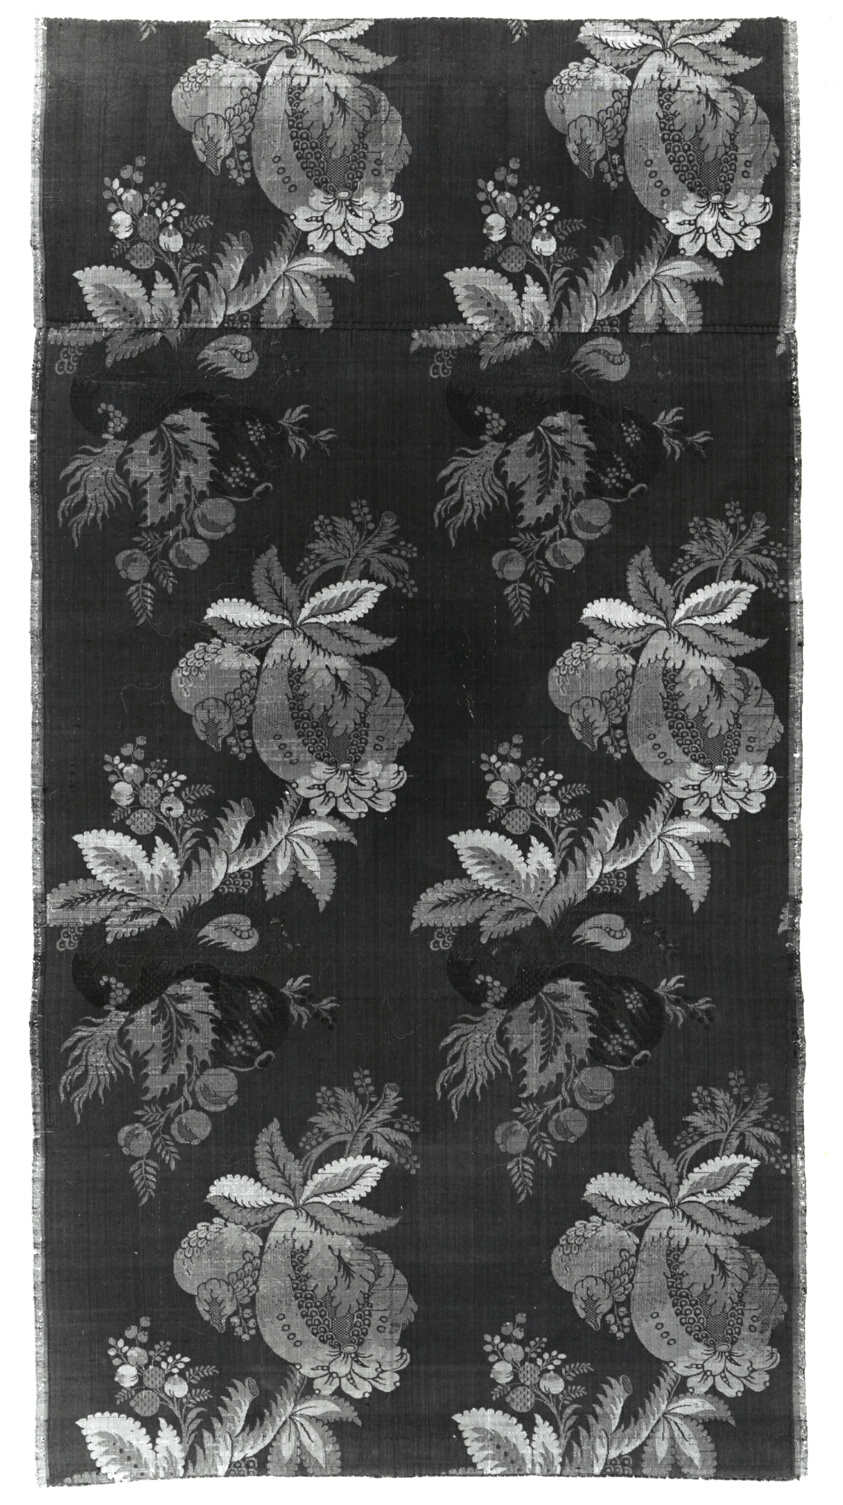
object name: Textile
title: Panel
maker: France or Netherlands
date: 1725/75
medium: Silk, plain weave with plain interlacings of secondary binding warps and supplementary patterning wefts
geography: France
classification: textile; weaving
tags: fruit, foliage, flowers